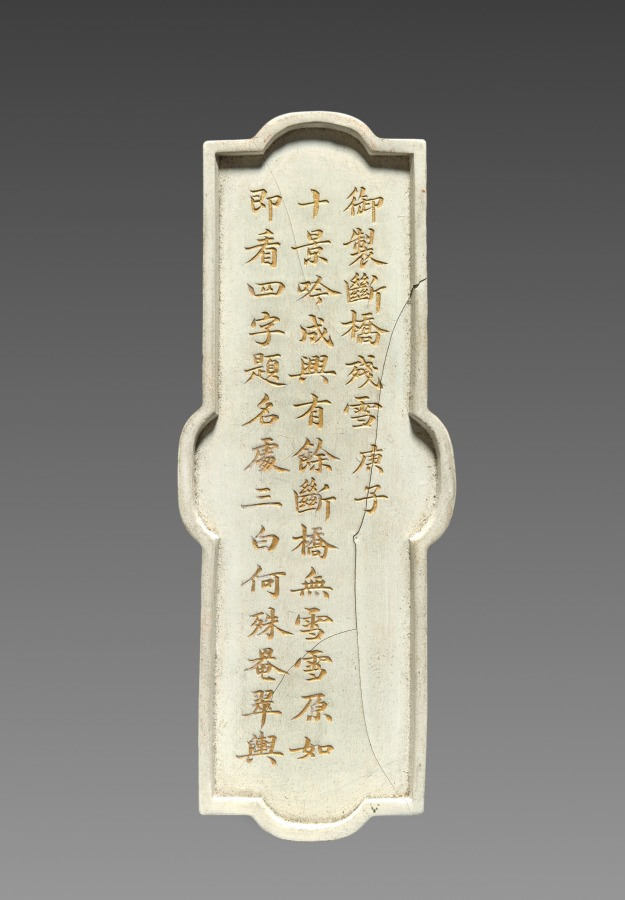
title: Ink Stick from an Imperially Commissioned Set of Ink Stick with Images and Poems of Famous West Lake Sites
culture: China, Qing dynasty (1644–1911), Qianlong reign (1736–95)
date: 1780–94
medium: Molded ink in white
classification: Miscellaneous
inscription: 乾隆年製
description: This is one of ten ink cakes of different shapes and colors stored in an exquisite lacquer box. Each is inscribed in gold with a poem by the Qianlong emperor, praising the ten famous sights of the Westlake in Hangzhou, near Shanghai. The Westlake is famous for its natural beauty; it was a favorite imperial destination and remains a tourist attraction today. Ink cakes (also called ink sticks) are dissolved with the addition of water and ground on the surface of a flat stone into liquid ink for painting and calligraphy. The precious ink cakes here, however, have never been used.